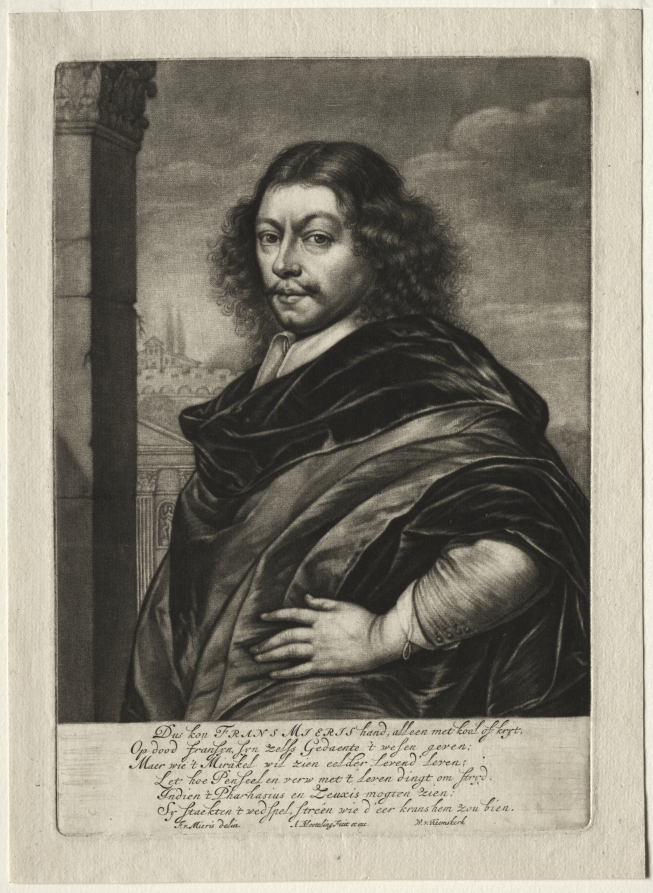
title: Frans van Mieris I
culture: Netherlands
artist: Abraham Blooteling (Dutch, 1640–1690)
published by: Abraham Blooteling (Dutch, 1640–1690)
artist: Frans I van Mieris (Dutch, 1635–1681)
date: 1655–90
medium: mezzotint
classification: Print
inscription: across bottom, in plate: Dus kon FRANS MIERIS hand, alleen met kool of kryt, / Op dood Fransyn, syn zelfs Gedaente 't wesen geven; / Maer wie 't Mirakel wil zien eelder Levend' Leven; / Let hoe Penseel en verw met 't leven dingt om stryd. / Indien 't Pharhasius en Leuxis mogien zien: / Sy staekten 't wedspel, streen wie d'eer krans hem zou bien. / F.v.Mieris delin. A Blooteling Fecit et exc. W.v. Heemskerk; VERSO, lower left, in graphite: no.16 / /-x.-. ; lower left, in graphite: T